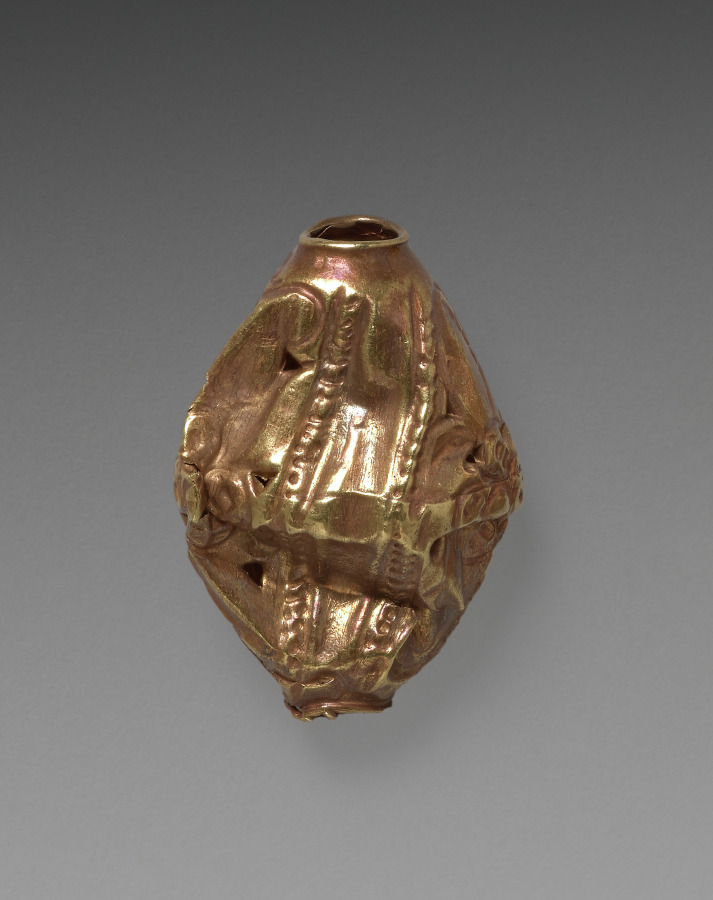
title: Bead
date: after 1519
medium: gold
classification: Jewelry